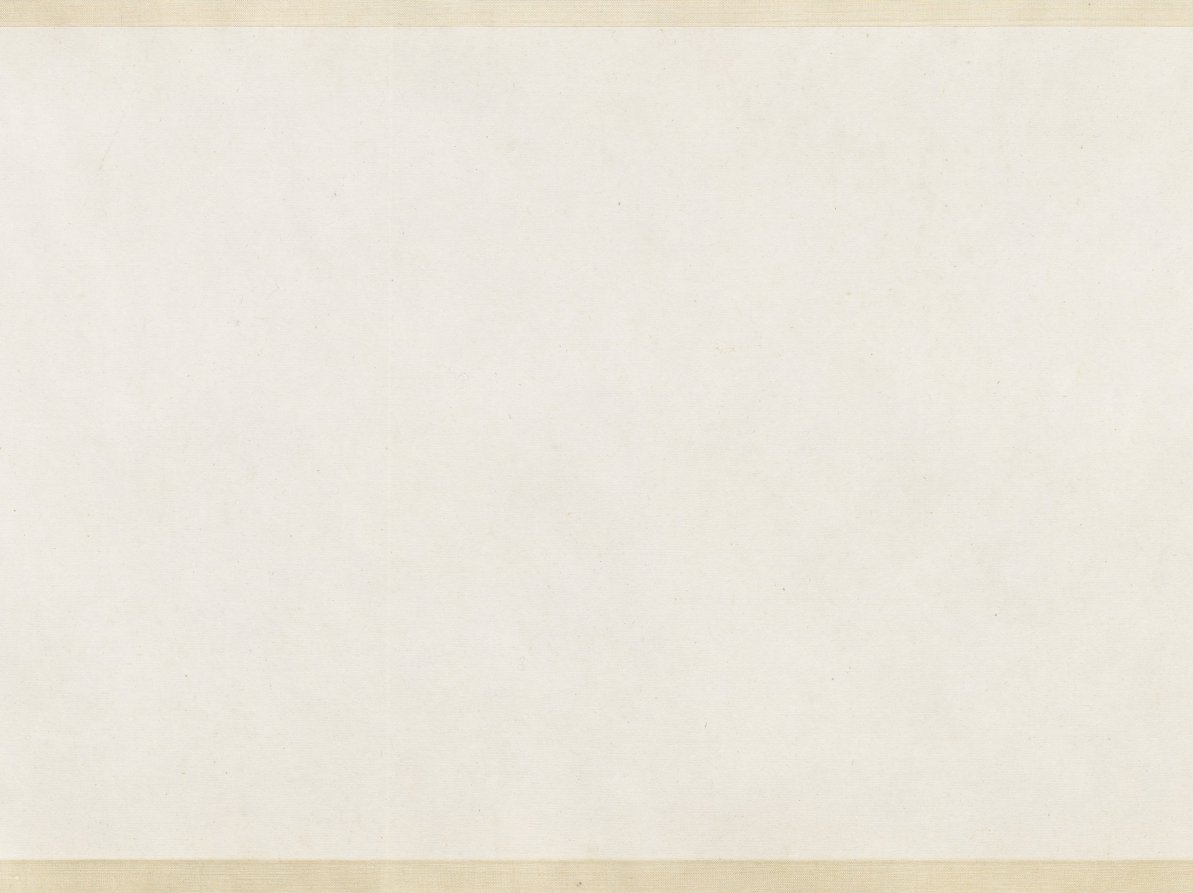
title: Sericulture (The Process of Making Silk)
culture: China, Southern Song dynasty (1127-1279)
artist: attributed to Liang Kai (Chinese, mid-1100s–early 1200s)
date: early 1200s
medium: Handscroll; ink and color on silk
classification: Painting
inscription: 3 colophons and 7 seals of Ch'eng Ch'i (20th c.).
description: By the Southern Song period, the economic center of the silk industry had shifted to the lower Yangzi delta, while the north continued to be troubled by wars. Divided into three sections, the handscroll illustrates 14 steps in the process of making silk, from the raising of silkworms to the weaving of silk cloth. The scroll’s scenes follow the illustrations of Lou Shou’s (1090–1162) Pictures of Tilling and Weaving (gengzhi tu), the first recorded painting of this genre, which was conceived in Hangzhou around 1145. However, in the Cleveland painting the artist groups several scenes of sericulture together under the roof of an open structure.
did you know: The painting is attributed to Liang Kai, a court artist active from about 1201 to 1204 at the Imperial Painting Academy in the city of Hangzhou, a major silk weaving center from that time to the present day.